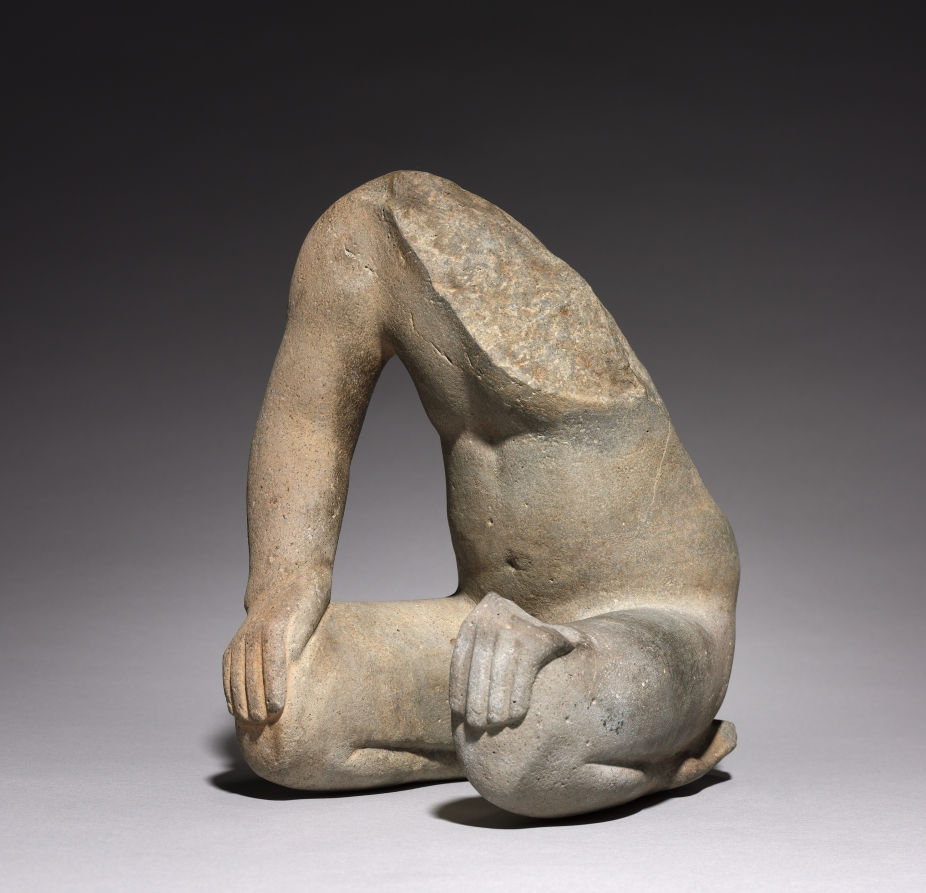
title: Kneeling Figure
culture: Mexico, Guerrero, Olmec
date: c. 1200–600 BCE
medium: stone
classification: Sculpture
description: Outside of the Maya, Olmec sculptures of humans have a naturalism unknown in other Mesoamerican artistic traditions. On this finely carved figure, the musculature of the arms, torso, and legs is carefully depicted, and even the fingernails and toenails and are shown.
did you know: An observant traveler discovered the left knee and hand fragment, orginally missing and now reunited.